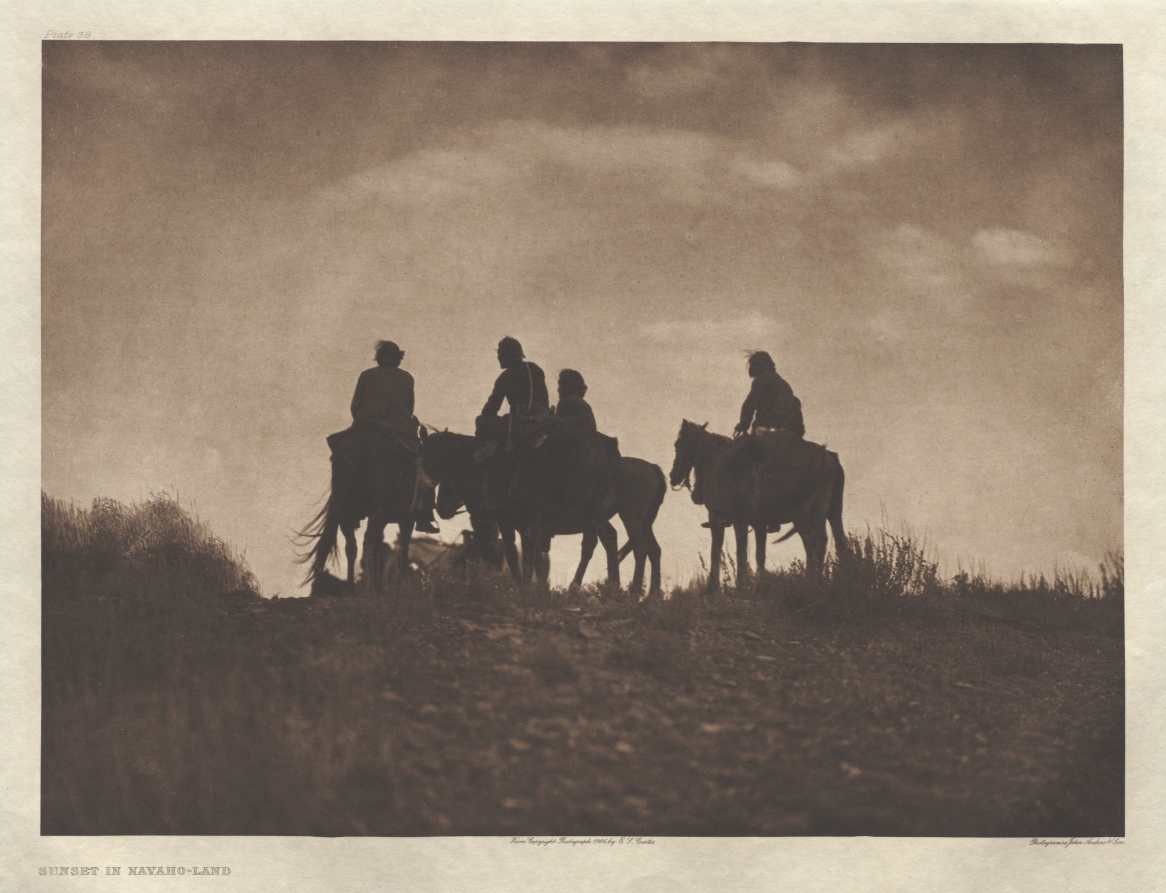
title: Portfolio I, Plate 38: Sunset in Navaho-Land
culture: America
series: The North American Indian: being a series of Portfolios picturing and describing the Indians of the United States, the Dominion of Canada, and Alaska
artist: Edward S. Curtis (American, 1868–1952)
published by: The University Press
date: 1904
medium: photogravure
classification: Portfolio